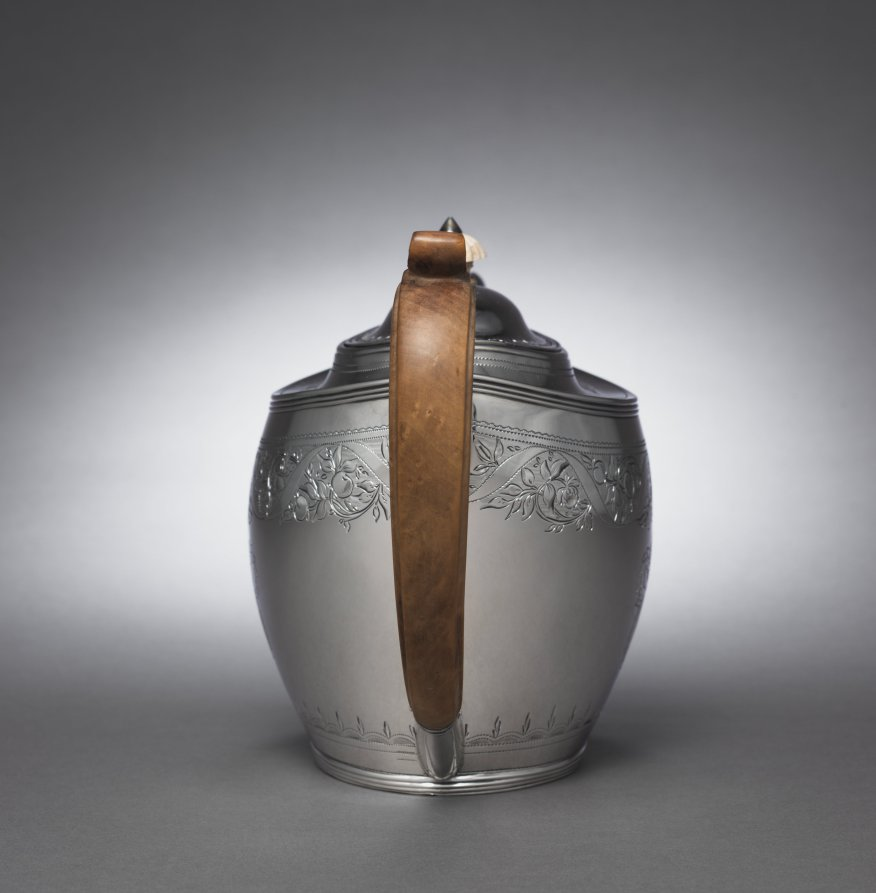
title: Tea Service (Teapot)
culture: London, England, 19th century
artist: Anne Bateman (British, 1748–1813)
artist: Peter Bateman (British, 1740–1825)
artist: William (I) Bateman (British, 1774–1850)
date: 1801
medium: silver, ivory, wood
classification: Silver